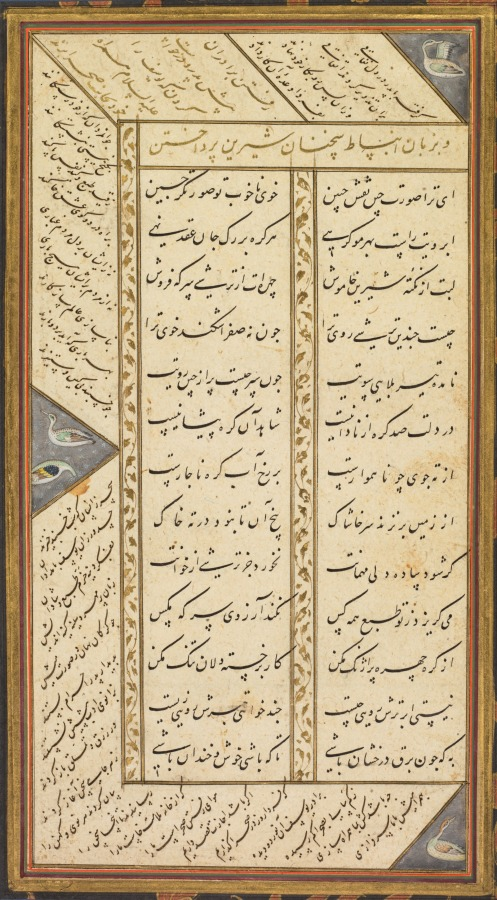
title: Folio B: Folio from the "Five Treasures" (Panj Ganj) of Jami (recto)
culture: Northern India, Mughal, early 17th century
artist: Mushfiq (Indian, active early 1600s)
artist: and others (Indian)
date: 1520–1607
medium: Gum tempera, ink, and gold on paper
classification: Painting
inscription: The miniature signed at upper left: ' amal - i Mushfiq sana 1015 (the work of the Mushfiq year 1015) Text on verso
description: This page contains two different texts, one written diagonally in the border and the other in the two central columns. The section of poetry in the border describes an episode from Joseph’s childhood in which his older brothers suggest to Jacob, their father, that they take Joseph into the countryside so that the boy can learn the area, although they actually plan to kill him. The poem in the central columns advises the reader to smile often, as a smile is sweeter and more pleasing than sugar.